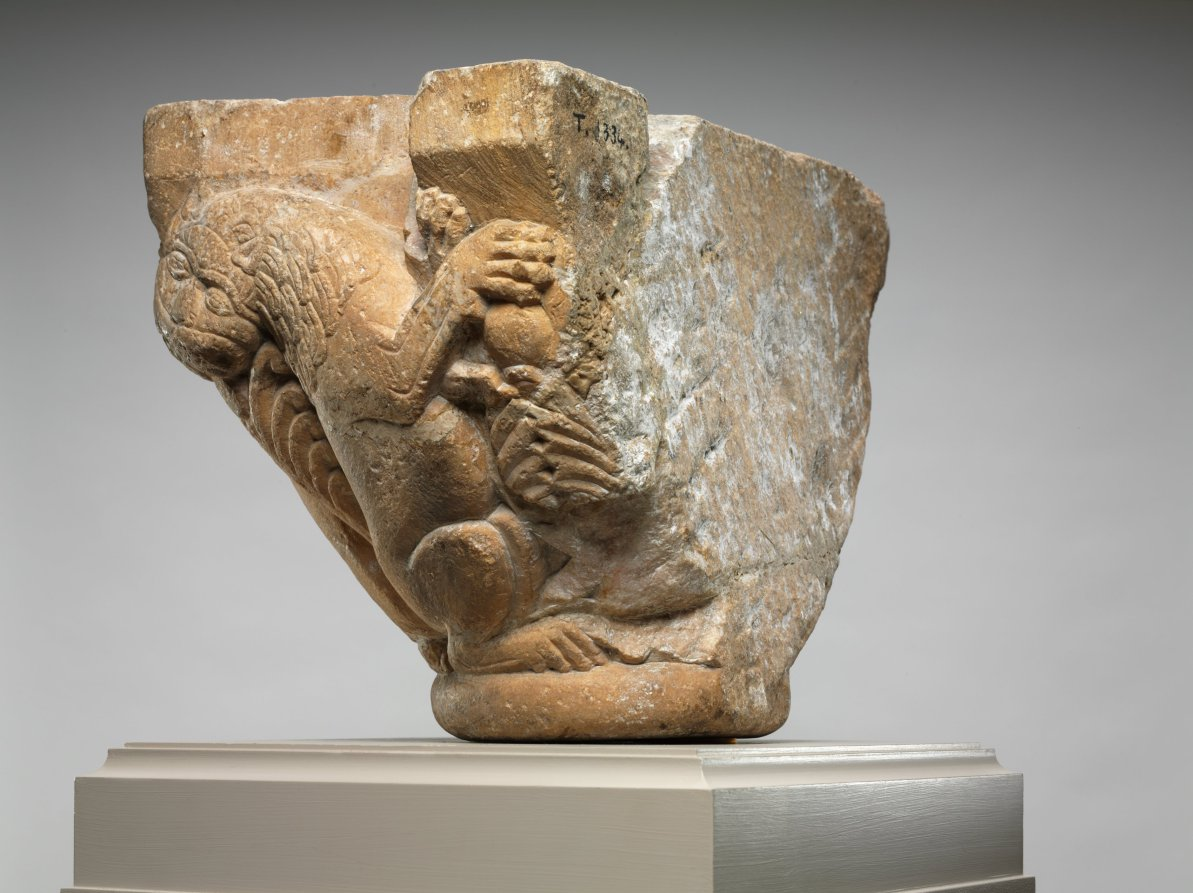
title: Engaged Capital with Lions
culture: Northern Spain (Navarre ?) or Southwest France (Pyrénées or Roussillon ?), mid-12th century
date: 1145–64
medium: marble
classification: Sculpture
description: The compositional motif of confronted and addorsed beasts illustrated on this capital was especially popular in churches along the pilgrimage roads.